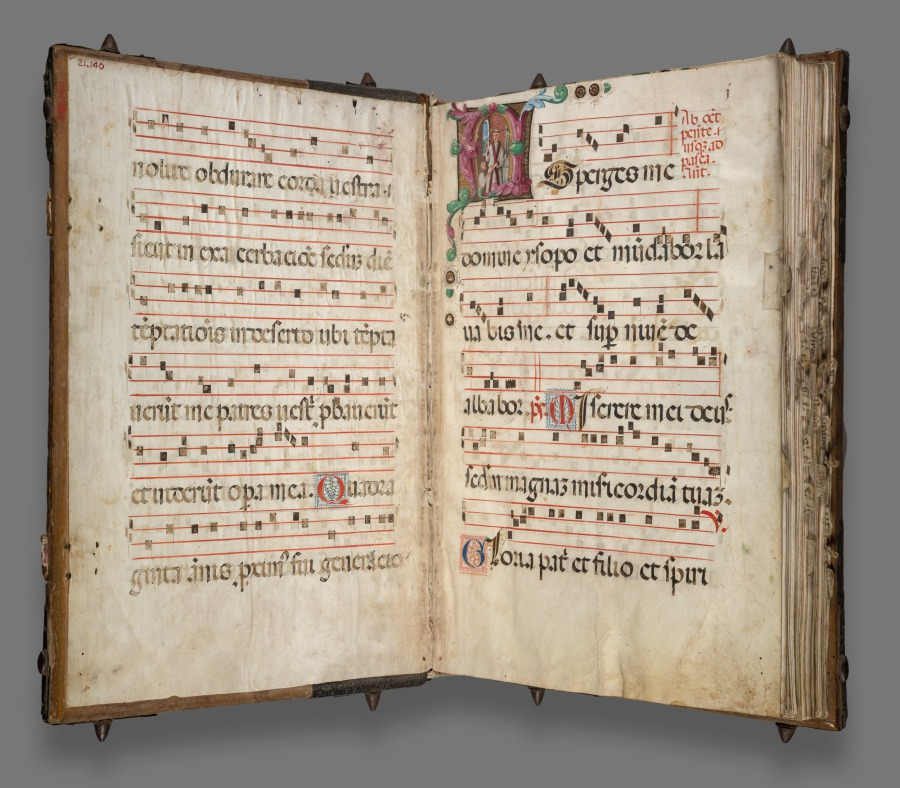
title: Gradual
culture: Italy, Verona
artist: circle of Girolamo dai Libri (Italian, 1474–1555)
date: c. 1520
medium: Ink, tempera, and gold on vellum; wood binding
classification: Manuscript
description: The liturgical book known simply as a “gradual” was the principal choir book used during the Mass. They were produced in multiple volumes, sometimes as many as 12, in order to cover the entire liturgical year. Every church required a set of graduals in addition to other liturgical books such as missals, antiphonaries, and gospel lectionaries. This volume appears to be the lone survivor from a larger set. Its illuminations were painted by an illuminator working in the circle of the much-esteemed and highly imitated painter Girolamo dai Libri of Verona, who was a prolific painter of altarpieces as well as illuminations for books.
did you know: Girolamo dai Libri was only 16 years old when he painted his first altarpiece.